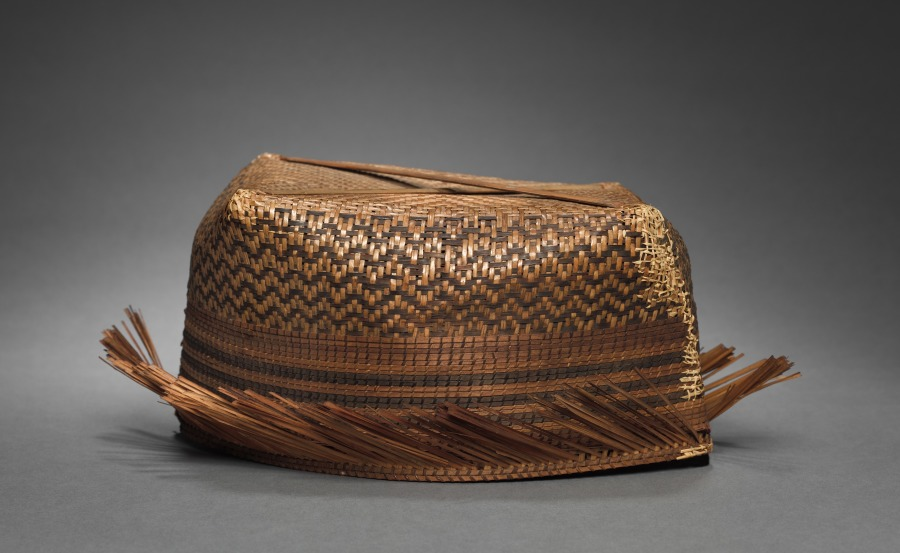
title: Hat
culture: Africa, Central Africa, Democratic Republic of the Congo, Mangbetu-style maker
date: before 1929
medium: Plant fibers and dye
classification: Garment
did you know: This woven hat looks brand new because it was one of the many items the business-savvy chief of Ekibondo had artists and artisans make for the foreigners who passed through his village.